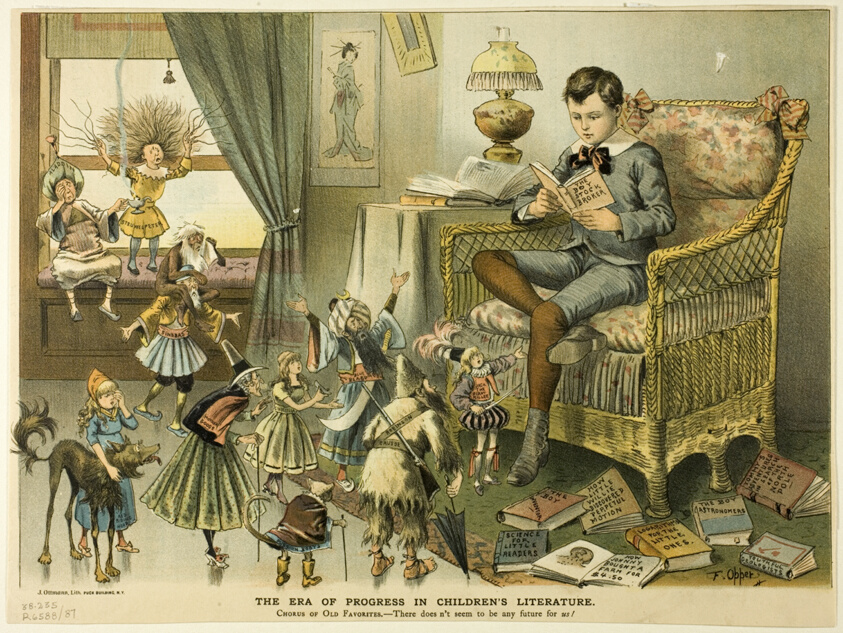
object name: Print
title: The Era of Progress in Children's Literature, from Puck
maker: Frederick Opper; American, 1857-1937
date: c. 1886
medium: Color lithograph on newsprint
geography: United States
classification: lithograph; print; prints and drawing